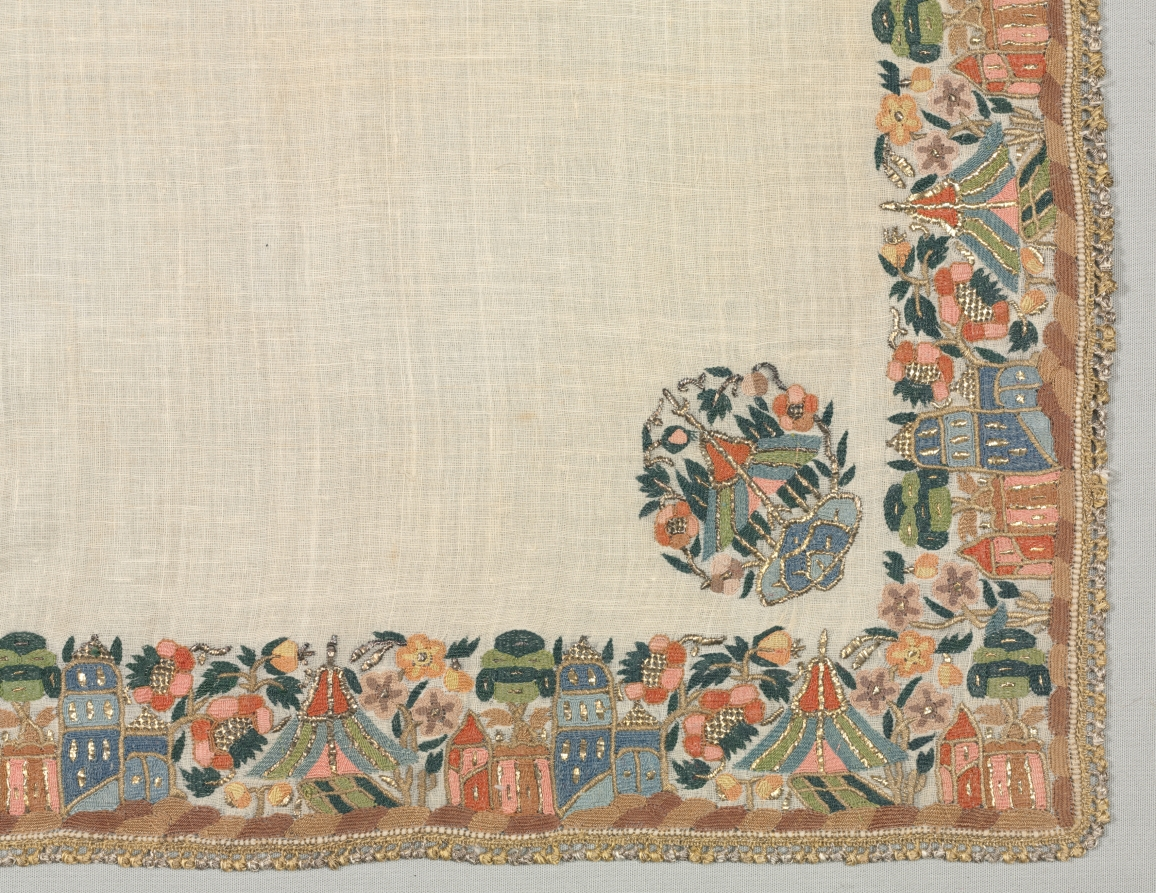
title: Embroidered head scarf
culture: Turkey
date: 1800s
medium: plain weave: linen; embroidery, double-running stitch: silk, gilt-metal strips and thread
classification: Embroidery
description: The edges of this headscarf are embroidered with landscape: a mosque alternates with a Turkish tent with a flowering plant between. In each corner is a medallion formed by a flowering plant surrounding a Turkish tent.